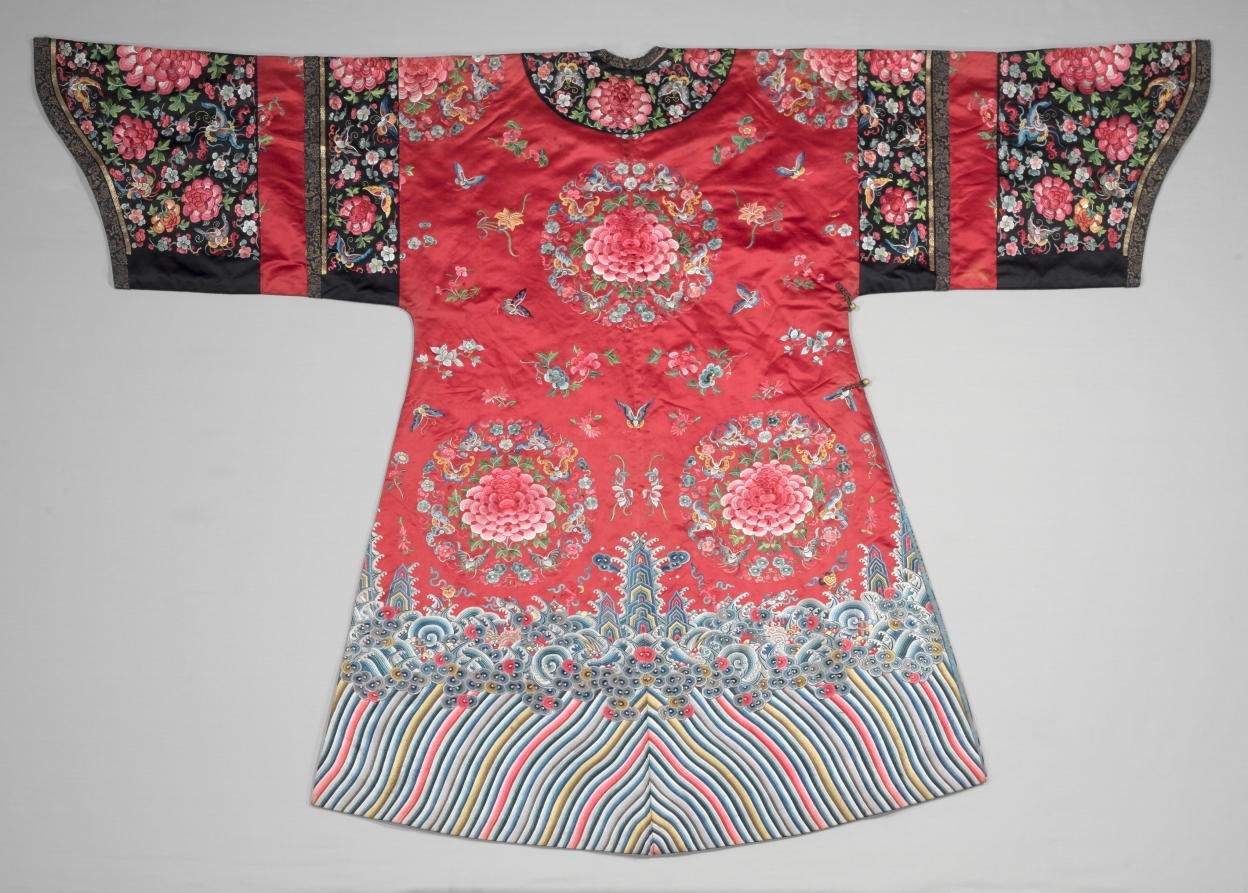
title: Ceremonial Robe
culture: China, Qing dynasty (1644-1911)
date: early 1900s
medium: Silk and gold thread: embroidery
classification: Garment